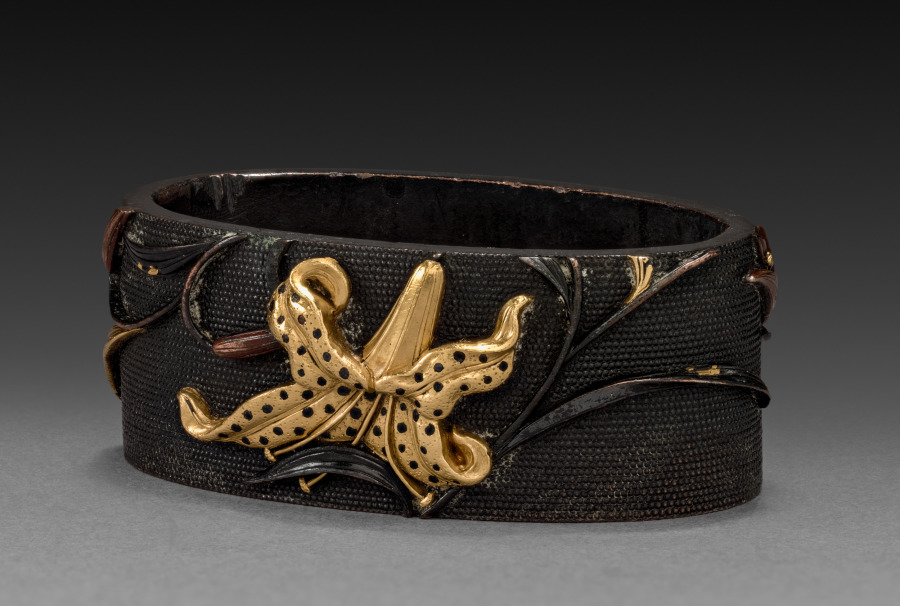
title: Sword-Hilt Collar (Fuchi)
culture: Japan, Edo period (1615–1868)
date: 1700–1850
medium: shakudo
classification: Arms and Armor